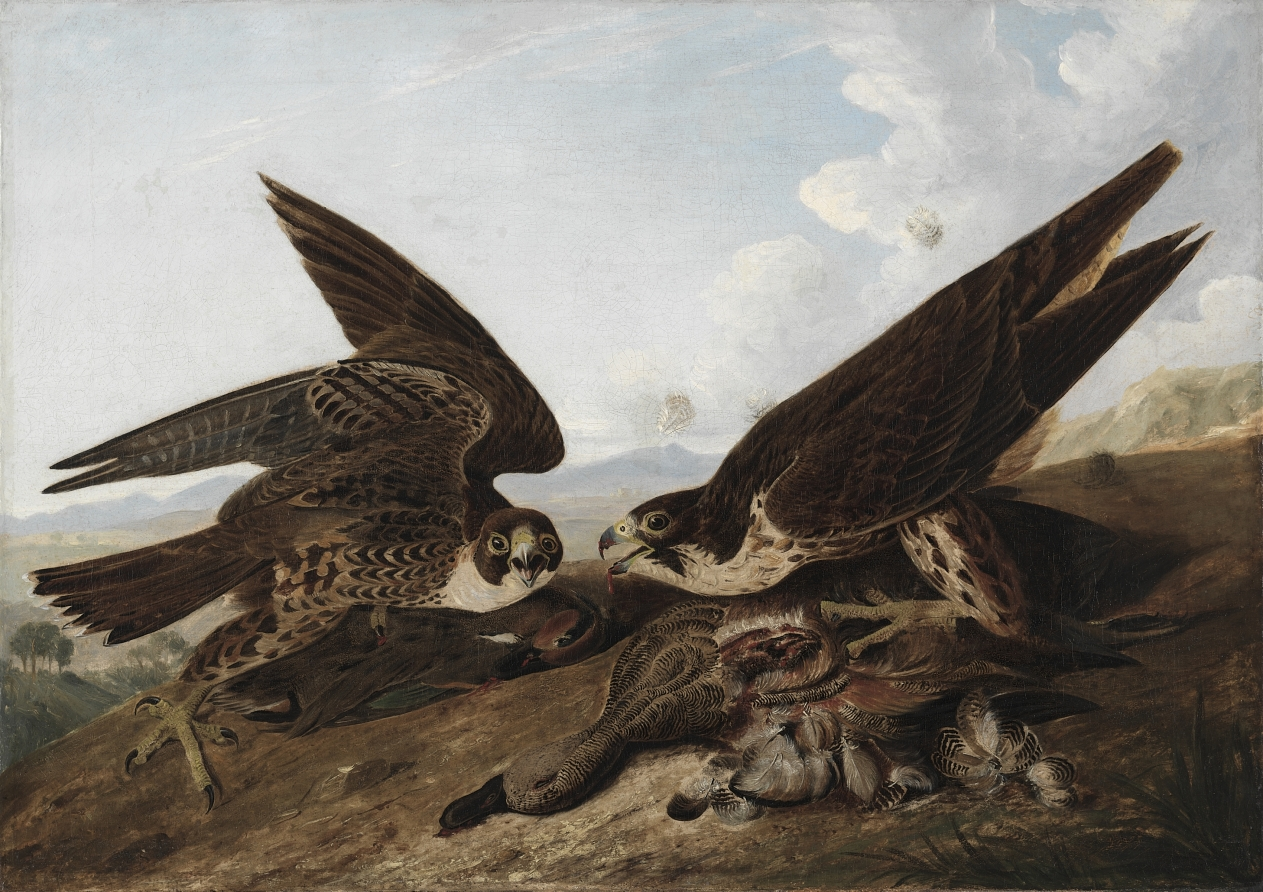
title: Peregrine Falcons (Duck Hawks)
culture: America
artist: John James Audubon (American, born Haiti, 1785–1851)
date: c. 1827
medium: oil on canvas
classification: Painting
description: A vigorous portrayal of two peregrine falcons with their fresh duck prey, John James Audubon's painting relates to his groundbreaking Birds of America publication that sought to depict every species of native North American bird posed in action with elements of their habitats. Based on his artistic and scientific successes, Audubon became the premier naturalist in the United States. After his death, he continued to be associated with bird and nature conservation, and several organizations devoted to such causes were named in his honor. However, in recent years, as Audubon's slaveholding and looting of Indigenous graves has become more widely acknowledged, an increasing number of these groups are changing their names.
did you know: Clocked at speeds more than 240 mph, peregrine falcons are the world's fastest animals.